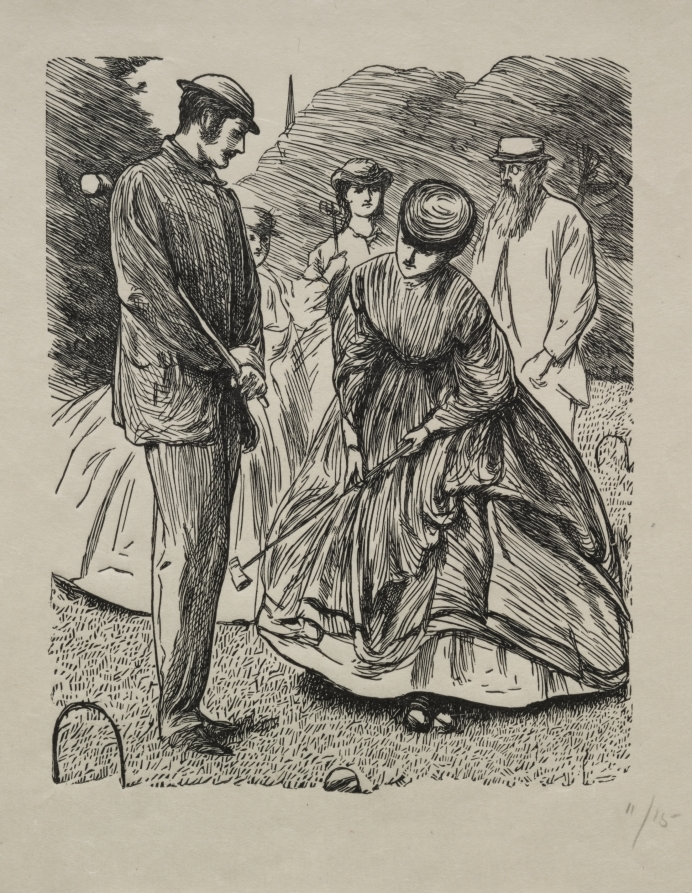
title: How Not to Play the Game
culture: England, 19th century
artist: George Louis Palmella Busson Du Maurier (British, 1834–1896)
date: 1865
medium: wood engraving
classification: Print